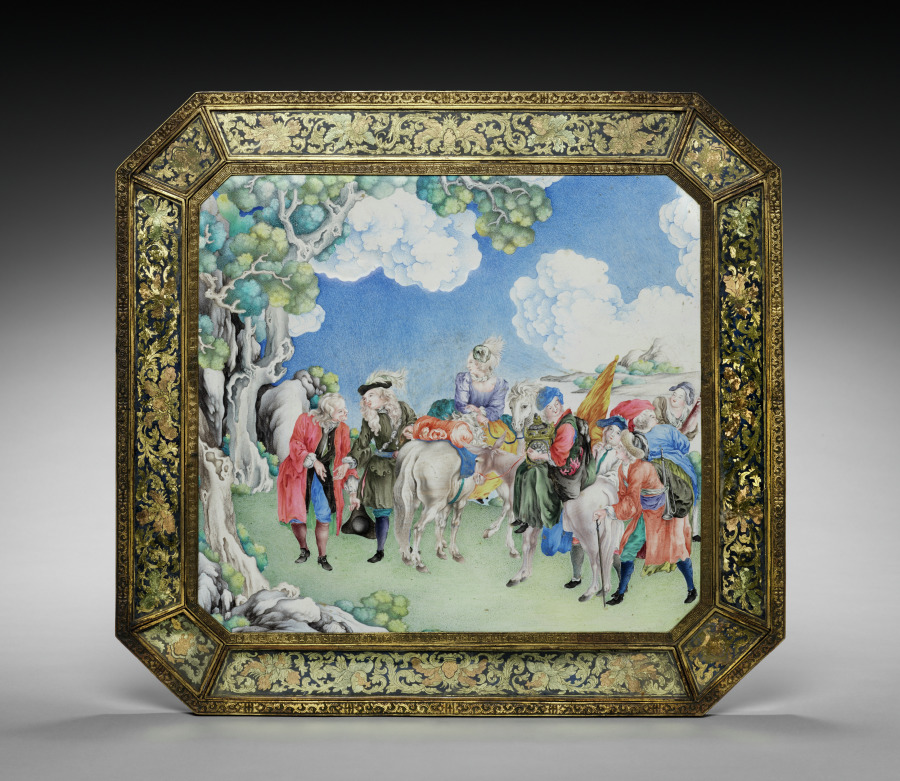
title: Screen with European Figures (obverse)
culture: China, Beijing palace workshops, Qing Dynasty (1644-1911), Qianlong reign (1736-1795)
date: 1736–95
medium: painted enamel, glass painting, and cast-iron stand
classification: Enamel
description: This two-sided table screen is an enamel-painted copper plaque with European figures. European enamelware was introduced to China through missionary-artists at the Beijing court and foreign trade in Guangzhou.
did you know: The image is probably derived from European prints, which were popular in the Qing court.